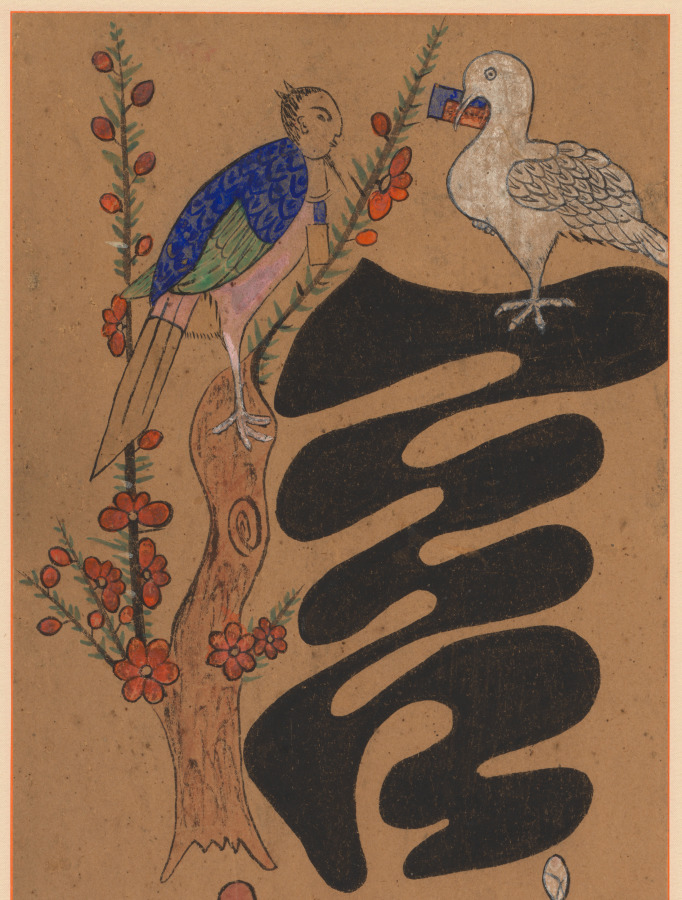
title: Munja-Chaekgeori Screen (Character-Books Screen)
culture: Korea, Joseon dynasty (1392–1910)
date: early 1900s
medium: Eight-panel folding screen, ink on paper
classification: Painting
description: This folding screen is a whimsical harmony of two different subjects: chaekgeori, or books and things; and munja, or characters. The lower section of each panel depicts the imagery of things, including books, decorative arts, and utilitarian objects. The upper portion of each panel bears a classical Chinese character. Read from far right to left, the eight characters refer to the values of Confucian teachings of the Joseon dynasty: filial piety, brotherly love, loyalty, trust, propriety, righteousness, modesty, and humility. While these two pictorial genres are harmoniously conjoined on the same picture plane, two sharply contrasting world views—urban consumerism and traditional Confucian ethics that despise materialism—compete with one another.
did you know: The eight Korean characters each mean filial piety, brotherly love, loyalty, trust, propriety, righteousness or justice, modesty or integrity, and humility or the feeling of shame.